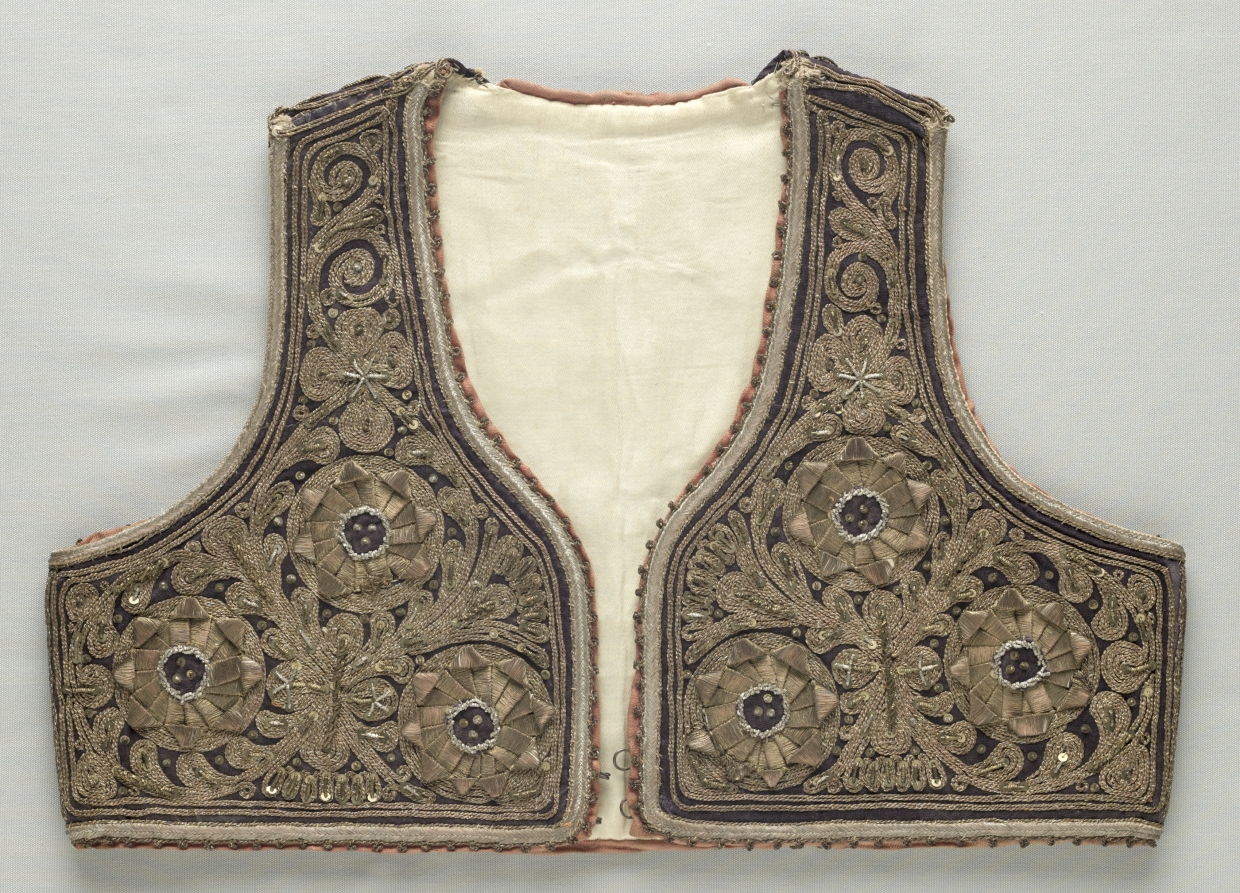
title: Vest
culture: Dalmatia, Late 19th century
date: late 19th century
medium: velvet, gold braid, sequins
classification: Garment